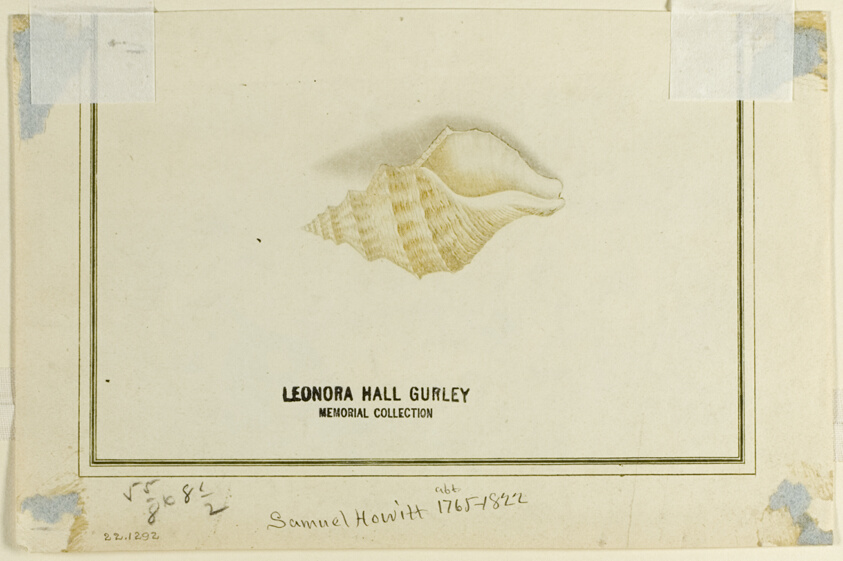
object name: Drawing and Watercolor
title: Tartars Hunting Deer (recto); Shell (verso)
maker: Recto attributed to Samuel Howett (English, c. 1765-1822); Verso by Unknown Artist (British, 19th century)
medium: Pen and brown ink, with brush and gray and brown wash, over graphite (recto), and print (verso), on ivory wove paper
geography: England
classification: ink or chalk wash; drawings (visual works); prints and drawing